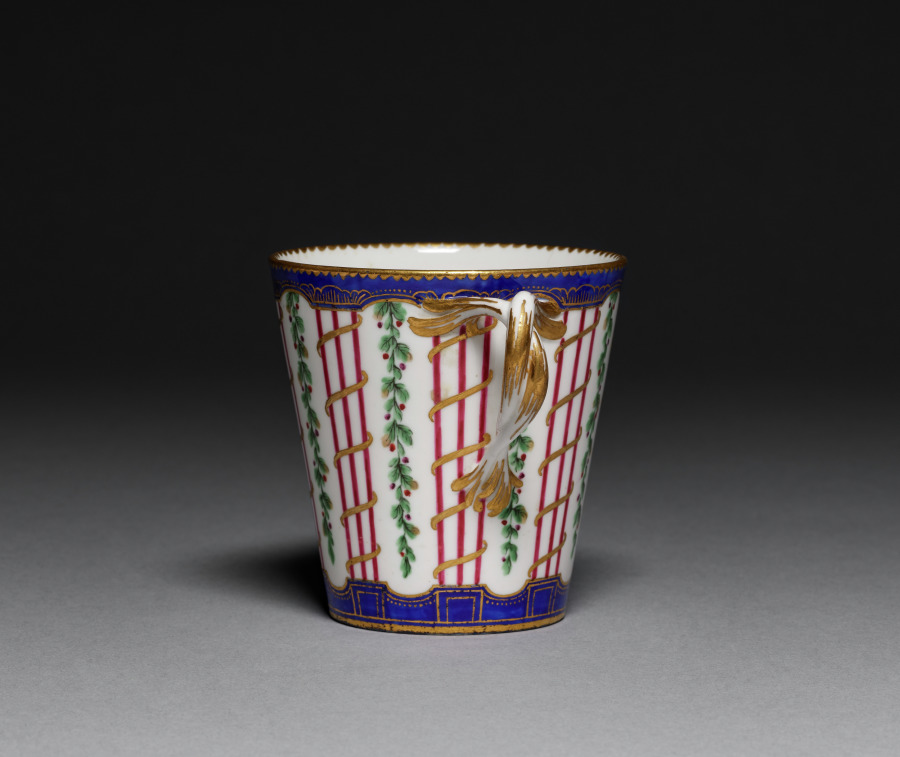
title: Cup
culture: France, Sèvres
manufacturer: Sèvres Porcelain Factory (French, est. 1756)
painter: Louis-Jean Thévenet pere (French, 1708-)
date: 1764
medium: soft-paste porcelain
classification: Ceramic